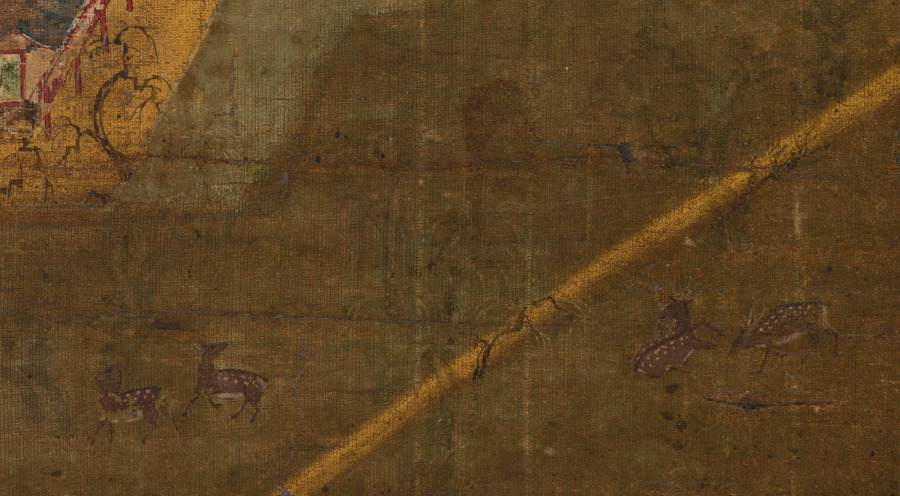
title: Kasuga Shrine Mandala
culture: Japan, Kamakura period (1185–1333)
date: early 1300s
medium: Hanging scroll; ink, color, and gold on silk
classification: Painting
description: A golden path beginning at the bottom of this painting leads up to four red-and-white buildings to the left, then to a fifth building on the right. These are the five shrine halls of Kasuga Taisha in Nara. Above and beyond the buildings is a sacred mountain range––with Mount Mikasa at center, Mount Wakakusa in gold to the left, and the sun or moon rising up behind the mountains. Sacred deer appear here and there. Five figures representing the original Buddhist forms of the five kami of the shrine complex stand on clouds above the mountains.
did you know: Sacred deer, the vehicles of the Kasuga deities, move about the shrine compound.